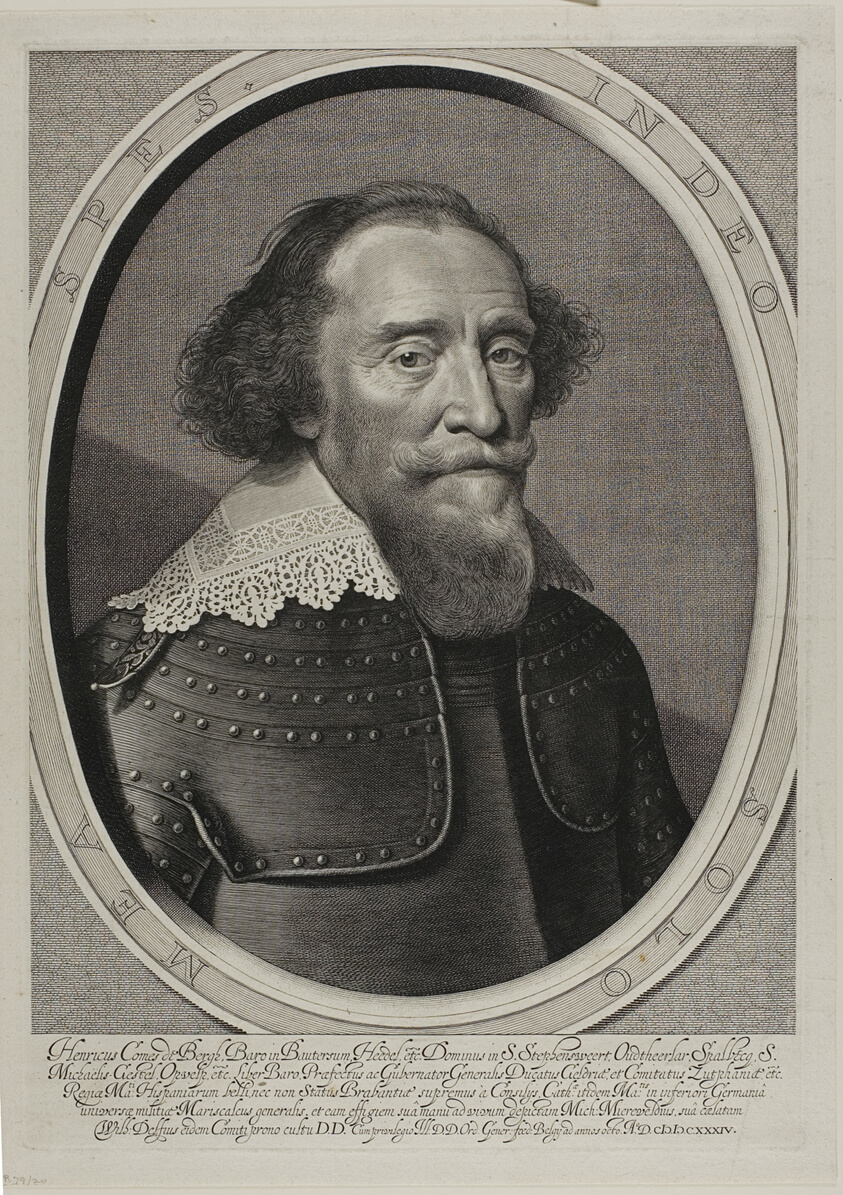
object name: Print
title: Hendrik Count van de Bergh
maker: William Jacobsz. Delff (Dutch, 1580-1638); after Daniel Mytens the elder (Dutch, c. 1590-before 1648)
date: 1634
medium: Engraving in black on cream laid paper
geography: Netherlands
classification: engraving; print; prints and drawing